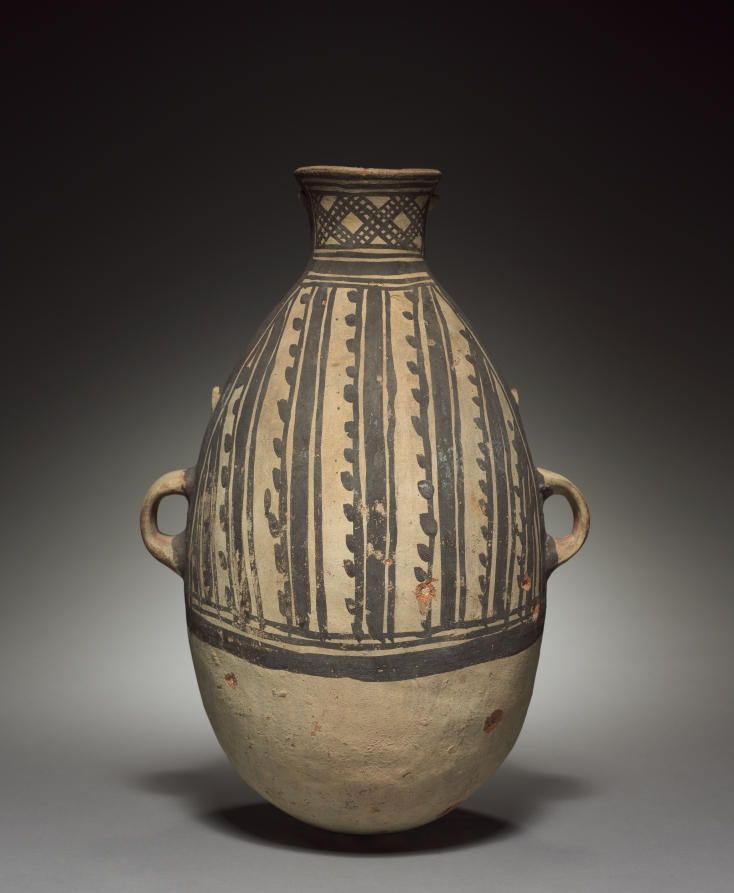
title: Bottle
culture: Peru, Chimú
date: 800–1500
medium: pottery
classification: Ceramic